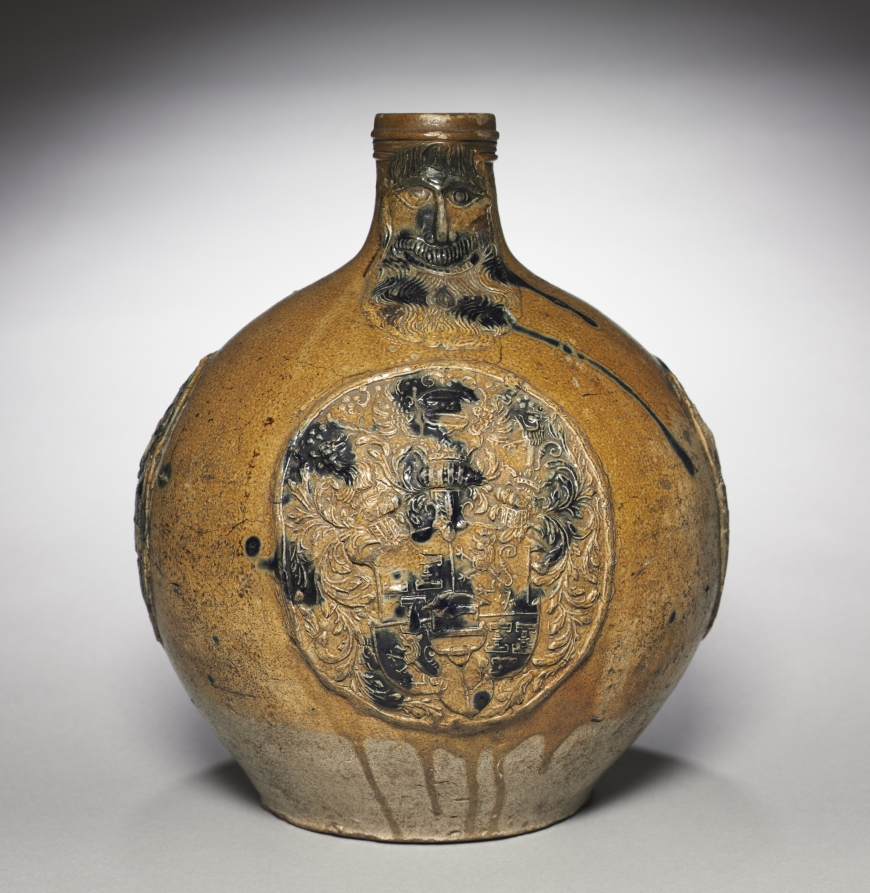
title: Jug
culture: Germany, Frechen, 17th century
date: 1608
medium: salt-glazed stoneware with applied and impressed decoration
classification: Ceramic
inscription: above the shield: 1608.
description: These globular jugs decorated with bearded masks on their necks represent an important type of Rhenish stoneware made from the 1400s onward. They were named "Bartmann" (Bearded Man) or "Bellarmine" jugs. The latter was a reference to Cardinal Bellarmine (1542–1621)—hated in Germany for his Counter-Reformational zeal—because of his supposed resemblance to the bearded images on these vessels. This jug bears the arms of the Pallant van Culemborg family of Gelders. The production and export of German stoneware reached its peak in the late 1500s. Prized for its durability and stone-like appearance, German stoneware became one of the most widely traded forms of pottery, even finding popularity in early America. The distinctive pebbly glass surface, resembling an orange peel, was achieved by introducing salt into the hot kiln during the firing process. This glaze gave clear definition to the coats of arms or other emblems that often formed the surface decoration on large works, usually jugs.